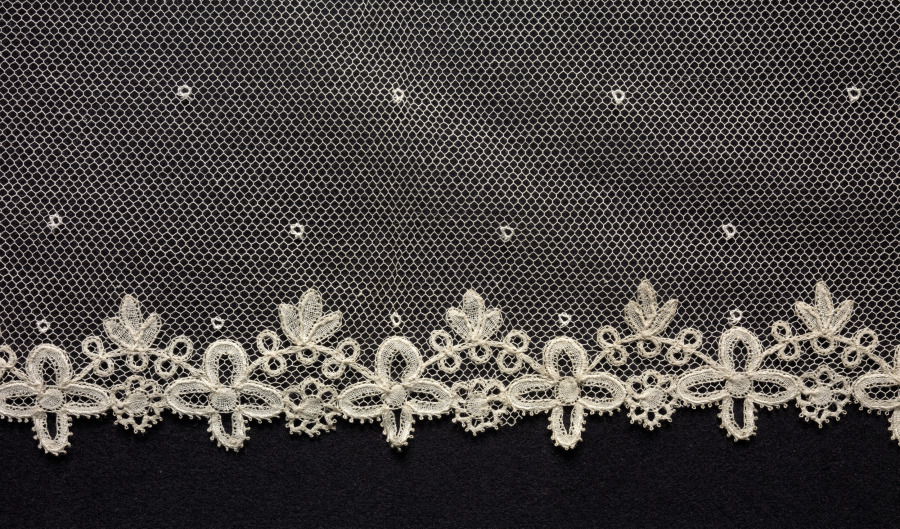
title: Lace Veil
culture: Flanders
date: 1811–99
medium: Bobbin lace and machine-made lace with applique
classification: Lace